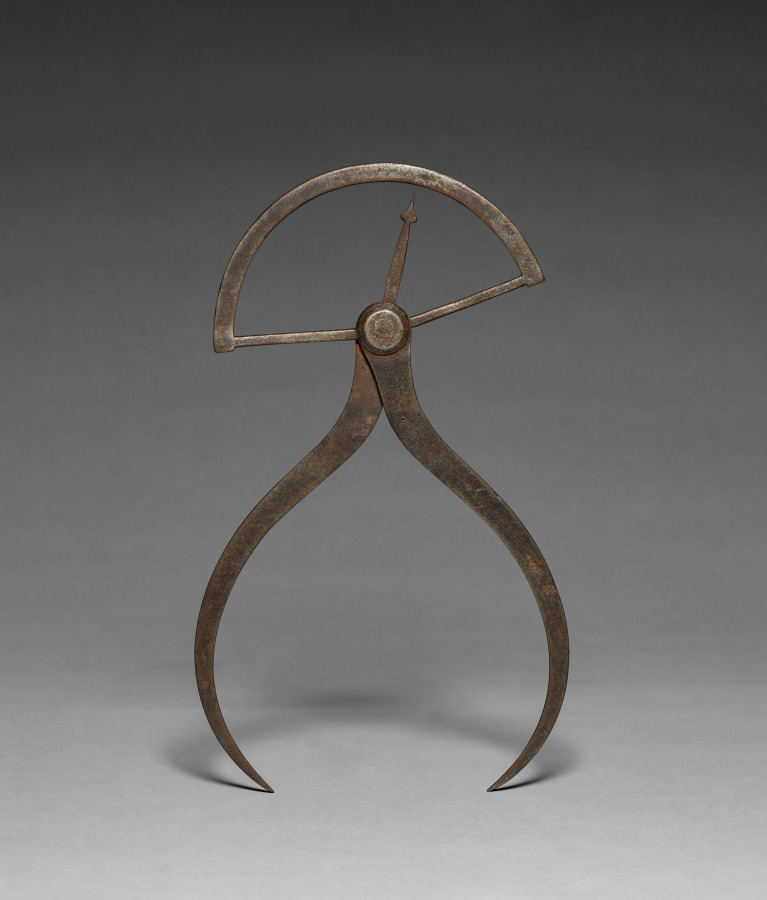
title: Calipers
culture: Europe, 17th century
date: 1600s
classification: Tool